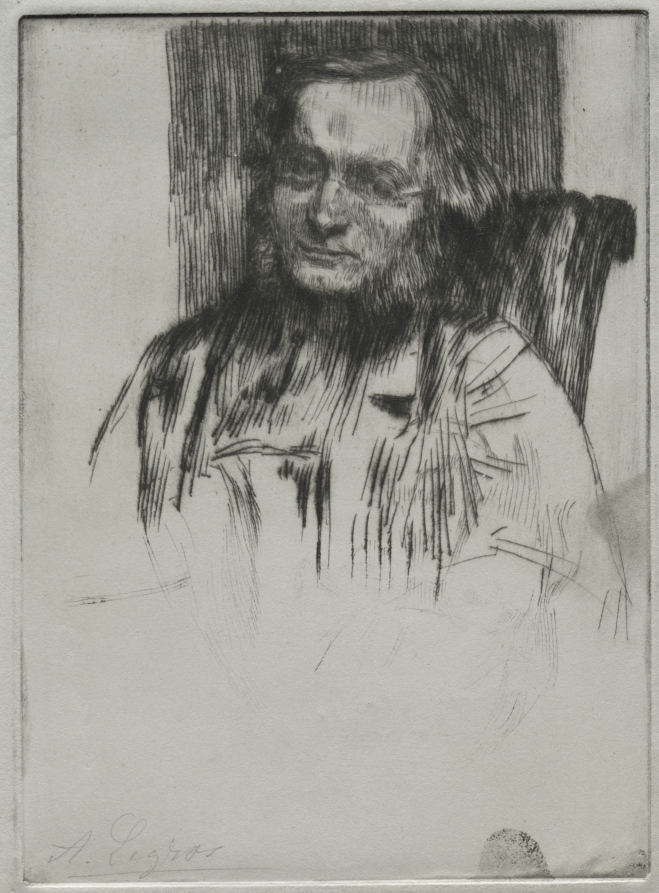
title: Edwin Edwards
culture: France, 19th century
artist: Alphonse Legros (French, 1837–1911)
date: 1861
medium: drypoint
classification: Print